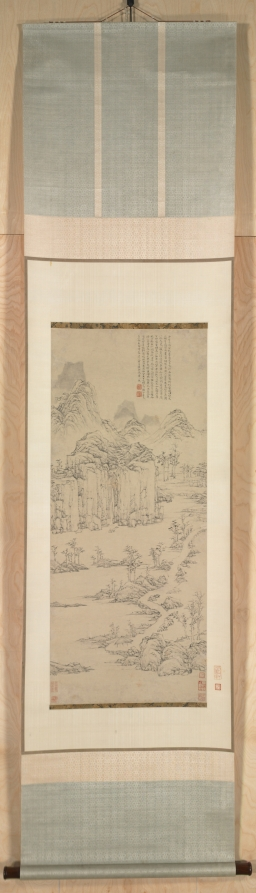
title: Daoist Retreat in Mountain and Stream (Landscape after Ni Zan [1301–1374])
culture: China, Ming dynasty (1368–1644)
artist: Lu Zhi (Chinese, 1496–1576)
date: 1567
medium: hanging scroll; ink on paper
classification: Painting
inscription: Artist's inscription, signature, and 3 seals: In my youthful days I liked to imitate the ink method of Yün-lin [Ni Tsan]. Mr. Wen, the academician [Wen Cheng-ming], remarked that I barely succeeded in achieving some resemblance. He once honored me with the inscription "lofty and imperturbable indeed was the personality of Ni Yü [Ni, the Odd]. Pale ink and blue smoke were formed by his scribbling brush. His surviving works have become so rare in the last two hundred years; only Pao-shan [Lu Chih] carries on his true tradition." In my older years, having to comply with frequent requests for paintings, my brushwork has become stronger than before and I thought to myself that I may have surpassed the Old Master. In the ting-mou year of the Lung-ch'ing era [1567] a friend brought a small painting [by Ni Tsan] and showed it to me in the mountains. I studied and enjoyed it for a long time, then realized that I was actually inferior. This gave me second thoughts about my earlier style, so I selected a piece of old window paper and did this painting in imitation. My friend was kind enough to say that it was truly a quick and close resemblance. I then wrote a colophon and presented the painting to him. My poem says: High mountains and distant waters are the thoughts coming from the lute; The drunken leaves and the sparse woods are merely flowers in the mirror. This idea, I'm sure, will be understood by Tzu-ch'i, one who appreciates my art, It is for him that I have painted on thin paper with light touches, The cloudy color of an autumn evening. This is the winter solstice of the same year. By then, Pao-shan, Mr. Lu, was already over seventy years of age. Could it be that one's brush also gets old together with one's age, as the saying goes. I put down my brush with a laugh. [2 seals] Lu Shu-p'ing shih, Pao-shan tzu. [seal, bottom left corner] Lu Chih shu-p'ing. trans. WKH 6 additional seals of Chu Ching-hou (n.d.).